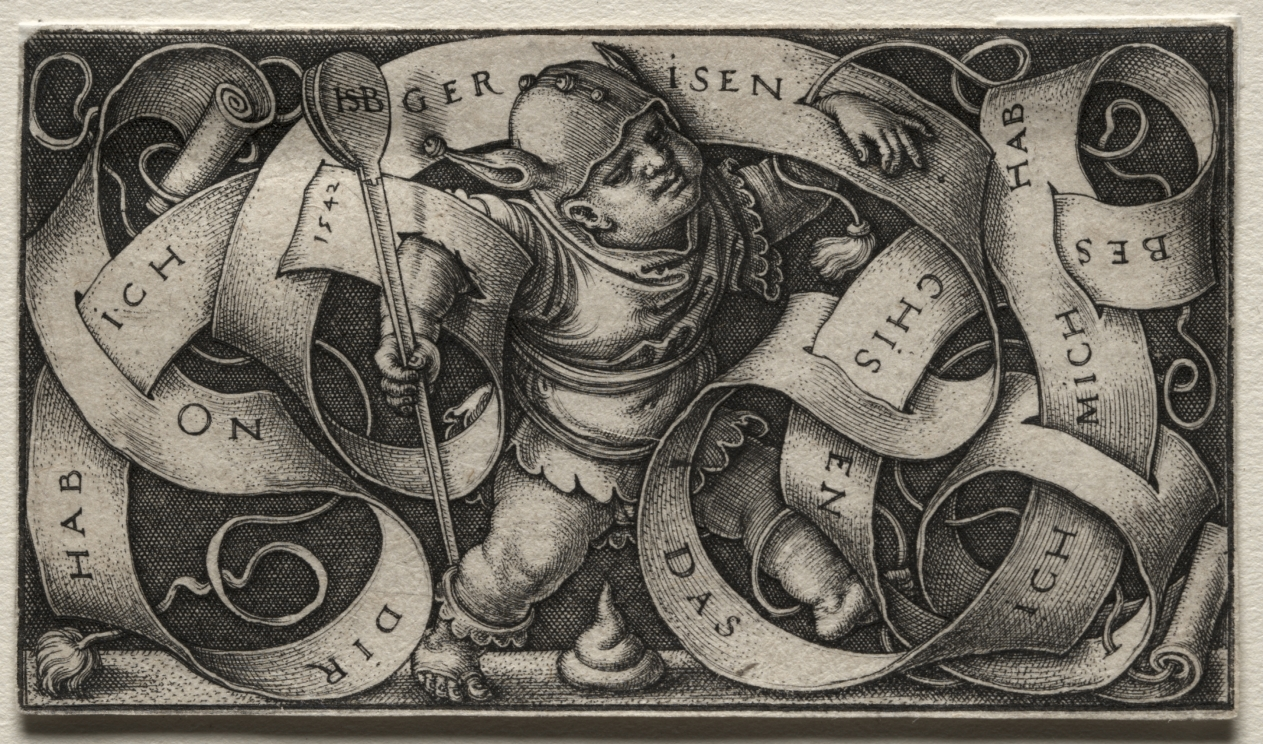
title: The Little Buffoon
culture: Germany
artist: Hans Sebald Beham (German, 1500–1550)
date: 1542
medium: engraving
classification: Print